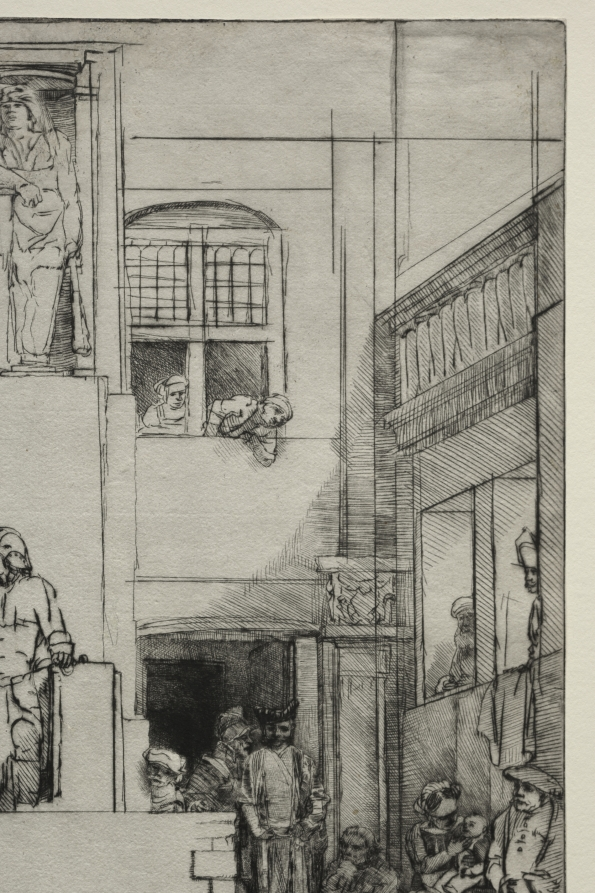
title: Ecce Homo. Christ Presented to the People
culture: Netherlands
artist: Rembrandt van Rijn (Dutch, 1606–1669)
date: 1655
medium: drypoint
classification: Print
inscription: Recto, upper left, in graphite: 79; lower left: FPS. Verso, in purple ink: Prince of Liechtenstein or Colnaghi for Liechtenstein stamp; in black ink, Zinser stamp, castle tower (rook chess piece); along side, in graphite: No. 36; along top: (illegible) name; upper left, in graphite: No 79 P(?) G (?) La Second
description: Rembrandt was an experimental and innovative printmaker and the first to execute works in pure drypoint on this monumental scale. Drypoint produces blurred lines and rich, velvety shadows, but these effects are lost as the plate wears. A limited number of rich impressions exist like this fine example of the fifth state, which demonstrates how Rembrandt redefined the expressive potential of printmaking. Rembrandt’s habit of drawing from life made him a keen observer of behavior and body language, endowing his biblical scenes with a human dimension and veracity not seen previously. The throng in Christ Presented to the People represents a cross section of the population and reflects the pictorial tradition that common humanity condemned Christ. Large areas of the imposing building, symbolizing the crushing weight and authority of the state, remain unworked so that blank white paper seems radiant in contrast to rich black shadows.